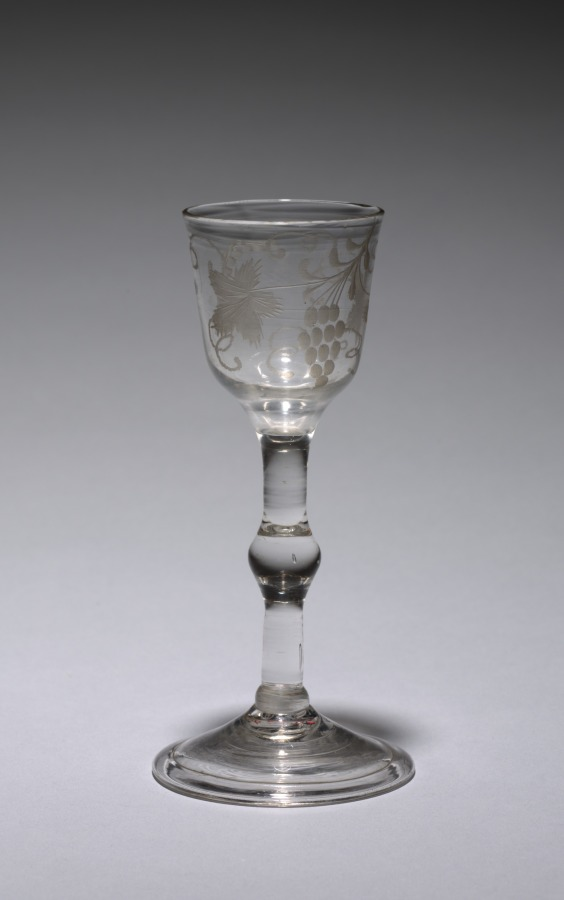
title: Wine Glass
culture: England, 18th century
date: c. 1775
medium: glass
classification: Glass